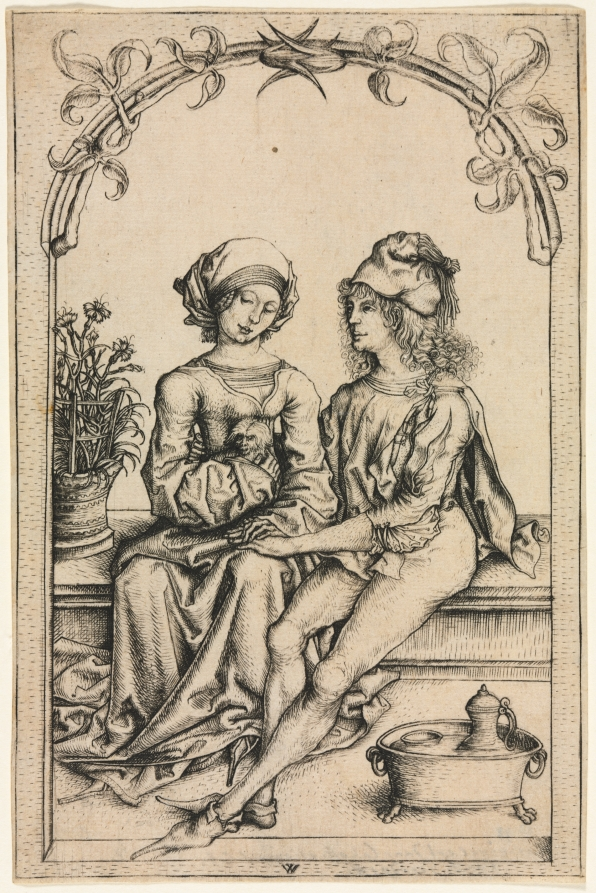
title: The Lovers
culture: Germany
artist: Wenzel von Olmütz (Bohemian)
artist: after Master of the House-Book (German, c. 1470–1500)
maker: after Hausbuch Master (German, active 1470–1500)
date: c. 1490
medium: engraving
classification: Print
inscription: Verso: Inscribed in ink in an eighteenth century hand: Copie apres Israel van Mecken par Wohlgemuth ou Widitz. L'original est dan la Collection de S. E. le Comte Gersdorff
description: In this image, a man and woman sit facing one another; the woman casts her eyes down shyly as the man makes a tender touch, an invitation to love. This artist pared down a garden of love to an arbor with a low fence, a vase of flowers, and a basin of water holding a jug of wine and cup. The love displayed in the garden is chaste, as intended. This is apparent by the wine in the water bath, suggesting cooled desire; the carnations in the vase, symbols of virginity; and the woman’s small dog, a sign of fidelity.